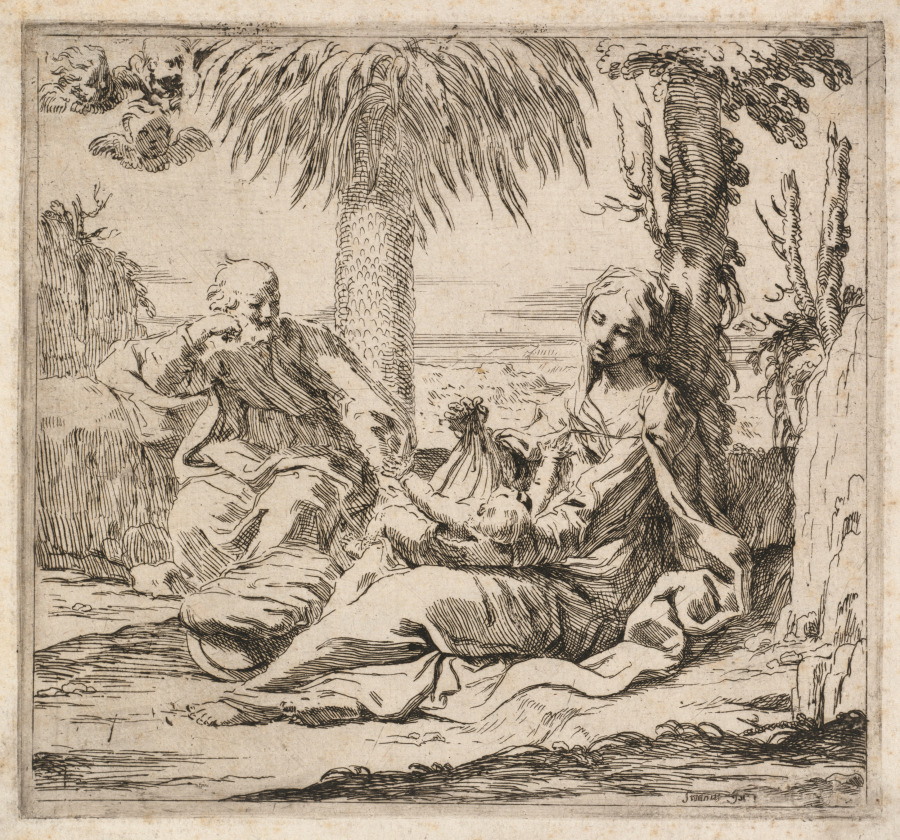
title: Rest on the Flight into Egypt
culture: Italy, 17th century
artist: Elisabetta Sirani (Italian, 1638–1665)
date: c. 1655–65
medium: etching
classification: Print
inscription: In plate, within image, lower right: Siranus Gal:1 Verso, in graphite: Sirani (underlined twice), Giovanni Andrea. / Bologna 1610-1670 signs GAS / IAS / Sirano / Siranus gol:1